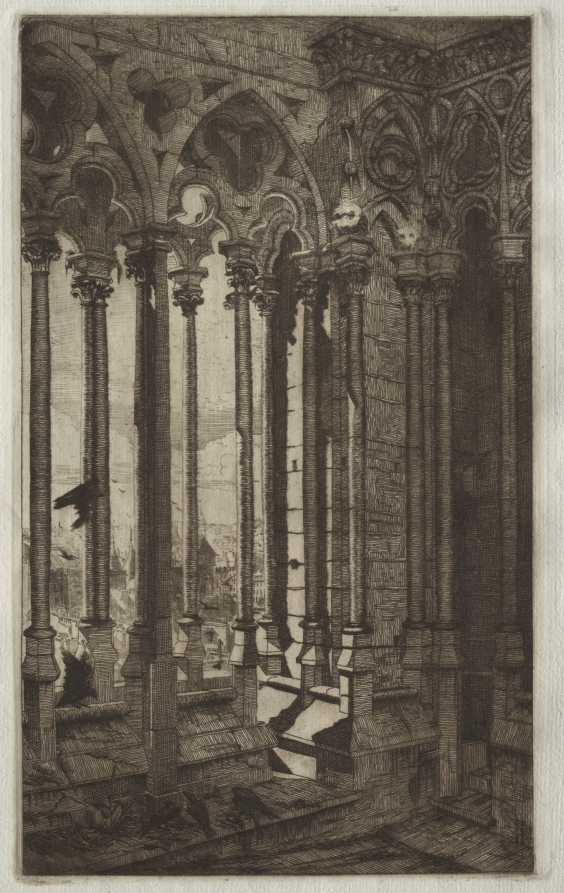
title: La Galerie Notre Dame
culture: France, 19th century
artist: Edmond Gosselin (French)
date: c. 1881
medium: etching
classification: Print